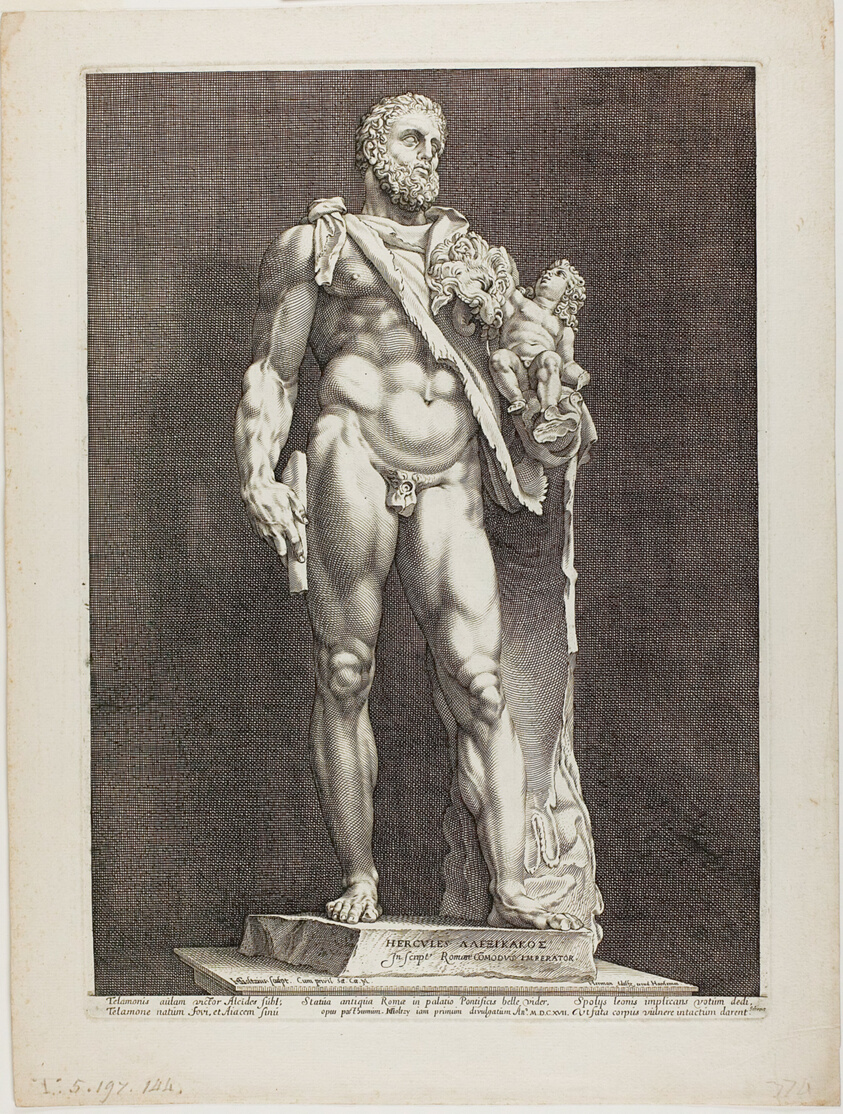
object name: Print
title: Hercules and Telephos, plate two from Three Famous Antique Sculptures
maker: Hendrick Goltzius (Dutch, 1558-1617); text written by Theodorus Schrevelius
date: c. 1592, printed c. 1617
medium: Engraving on ivory laid paper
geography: Netherlands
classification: engraving; print; prints and drawing